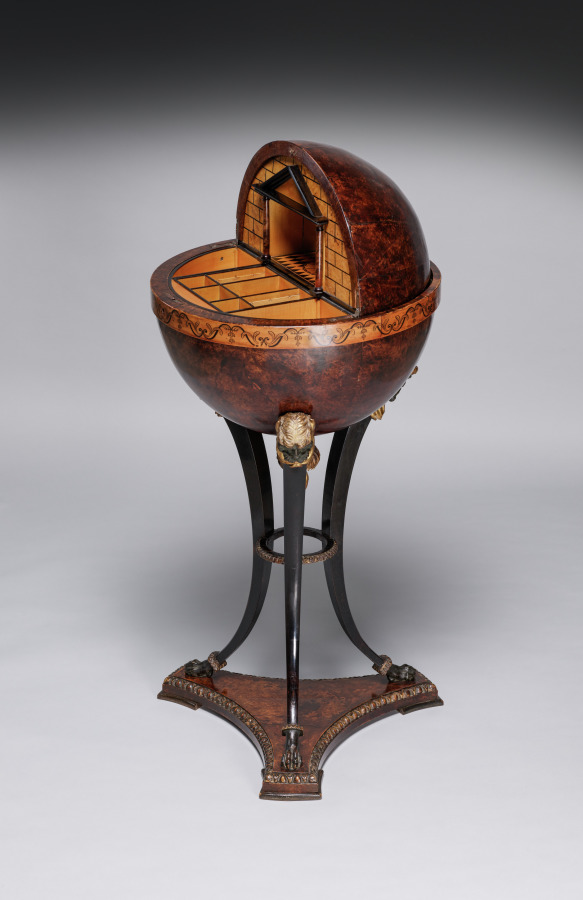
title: Globe Work Table (Globustisch)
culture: Austria, Vienna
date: c. 1810–15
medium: Burl walnut veneer, mahogany, ebony, satinwood, gilt wood, painted wood; mirrored glass; metal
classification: Furniture and woodwork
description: Work tables resembling globes were the usual form for a lady's sewing or writing table around 1800 in Austria. Combining moving parts, secret compartments, and highly finished decoration, these tables were also a way for the cabinetmaker to show off his skill. The tripod supports and temple-like architectural quality of both the exterior and interior decoration reflect the fashionable taste for neoclassical style, or Biedermeier as it was called in Austria, where Vienna was the center of such elaborate furniture production.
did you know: The top half of the globe rotates upward to reveal hidden compartments for sewing tools, threads, and unfinished fabric pieces.